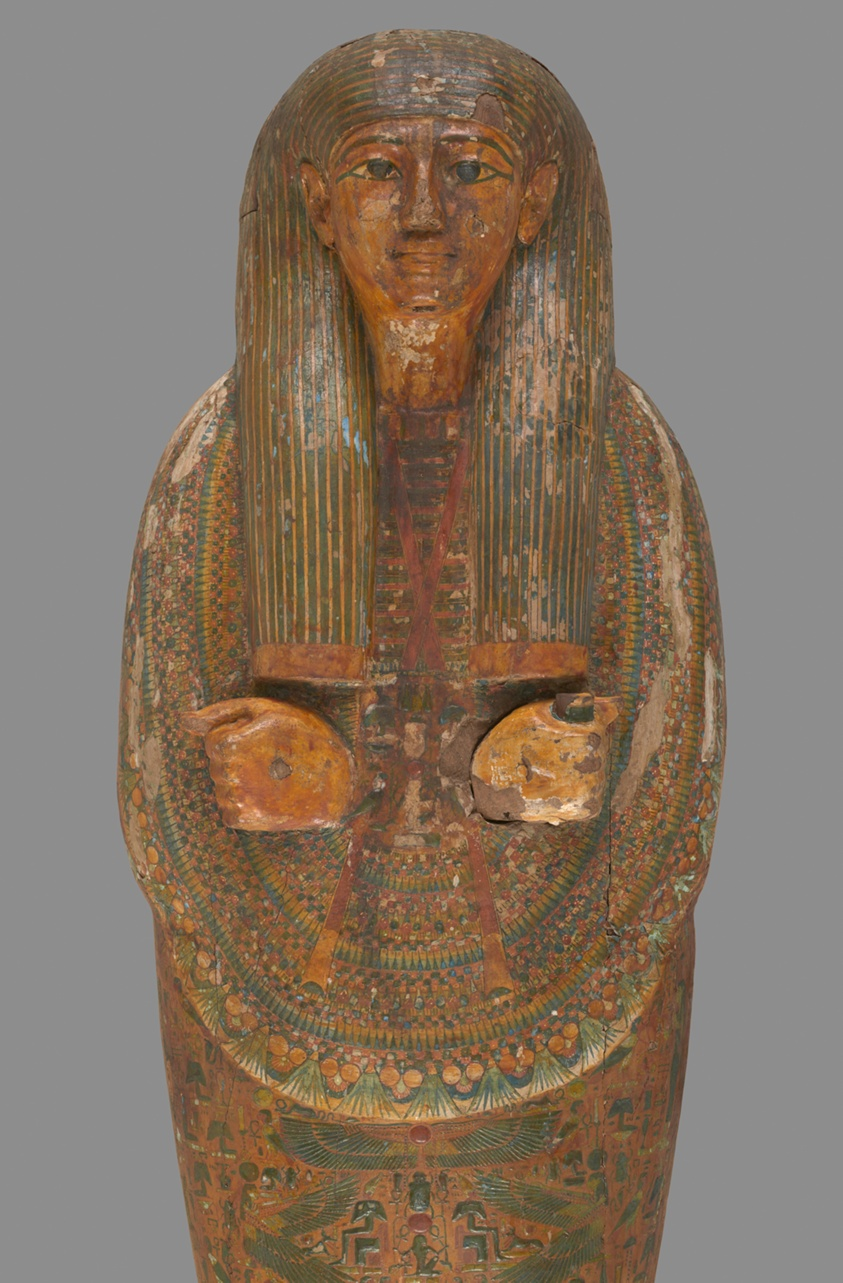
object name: Funerary Object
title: Coffin of Nespahertahat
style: twenty-first dynasty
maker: Egyptian; possibly Deir el-Bahri, Thebes (now Luxor), Egypt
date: Third Intermediate Period, Dynasty 21 (about 1069 –945 BCE)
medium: Wood and pigment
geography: Ancient Egypt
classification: coffin; ancient art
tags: funerary art